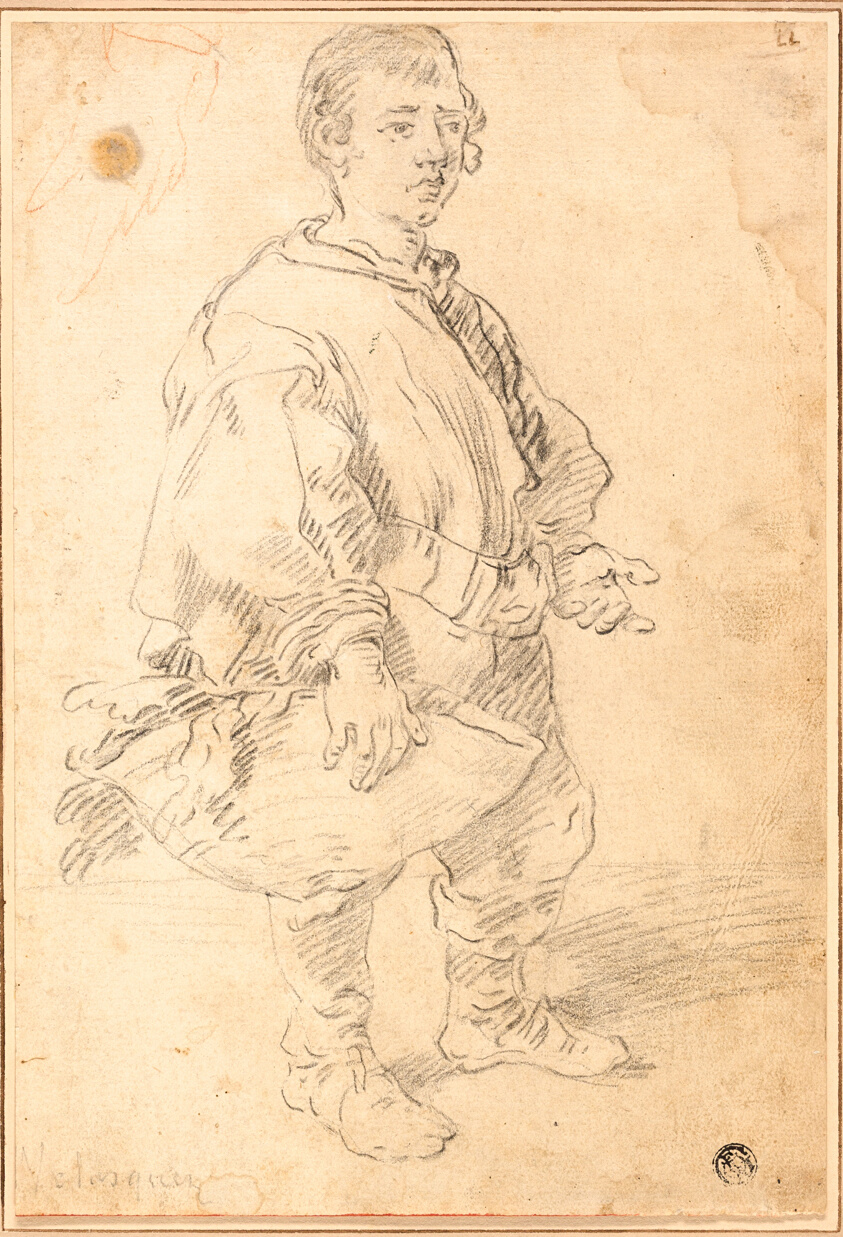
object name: Drawing and Watercolor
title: Portrait of a Boy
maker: School of Diego Velázquez; Spanish, 1599-1660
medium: Black chalk, with touches of red chalk, on cream laid paper, tipped onto tan wove paper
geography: Spain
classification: chalk; drawings (visual works); prints and drawing